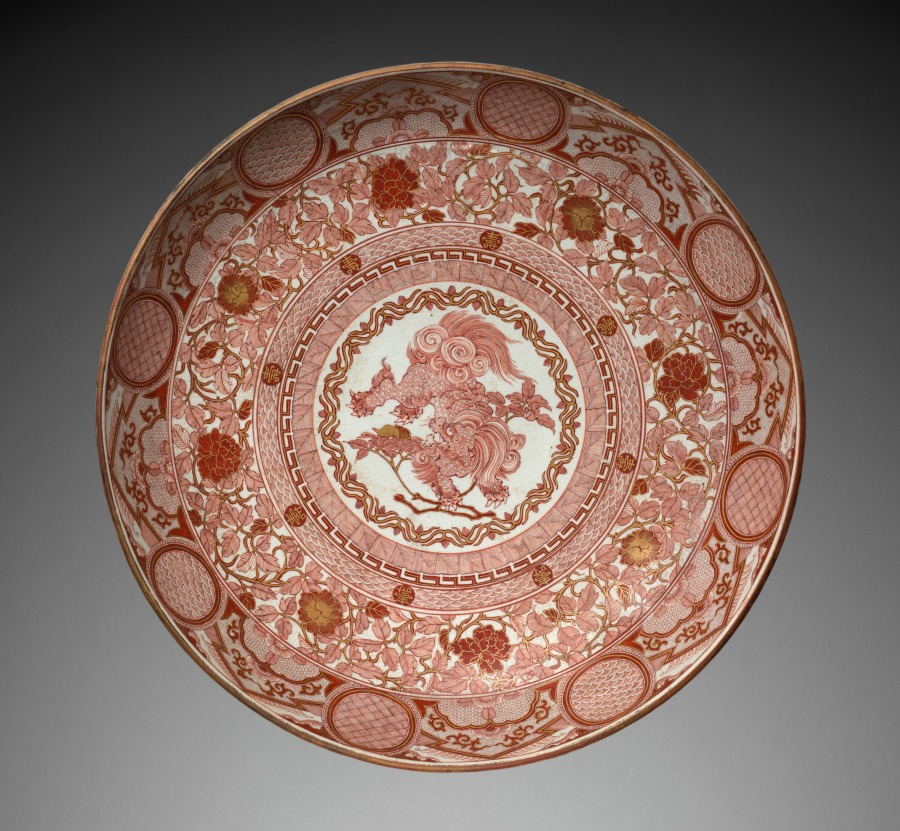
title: Bowl: Kutani Ware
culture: Japan, Edo period (1615–1868)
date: early to mid-1800s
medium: porcelain with overglaze enamel and gold decoration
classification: Ceramic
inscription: on bottom: "Kutani Dashoken ni-oi-te Yagi Jinsaku Sei-su" [Yagi Jinsaku made this bowl at Dashoken factory in Kutani].